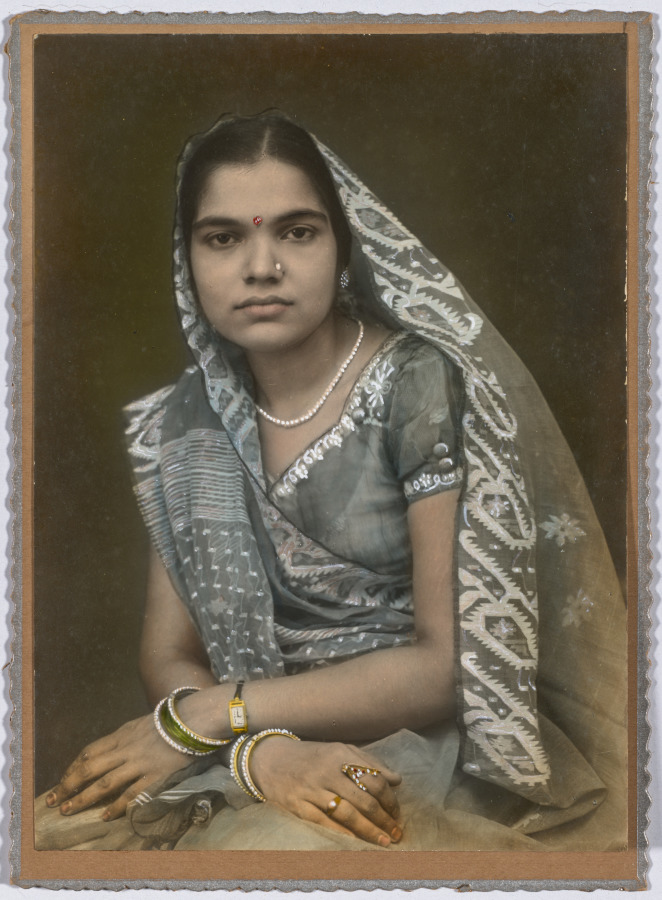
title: Untitled (Portrait of a Woman in Gray Sari and Veil)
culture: India, 20th century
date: 1900s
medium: Gelatin silver print, hand colored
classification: Photograph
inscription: Written in black ink on white adhesive label on verso: “Unknown Studio, India/Vintage hand colored/argentic print/140 pounds {crossed out in pencil]60 euros”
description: This hand-tinted portrait photograph is a modern example of a tradition in Indian painting that extends back to the mid-1800s. Having a photograph hand painted required an extra charge, but made the portraits more lifelike and endowed them with the status of a luxury item, akin to painted portraiture.